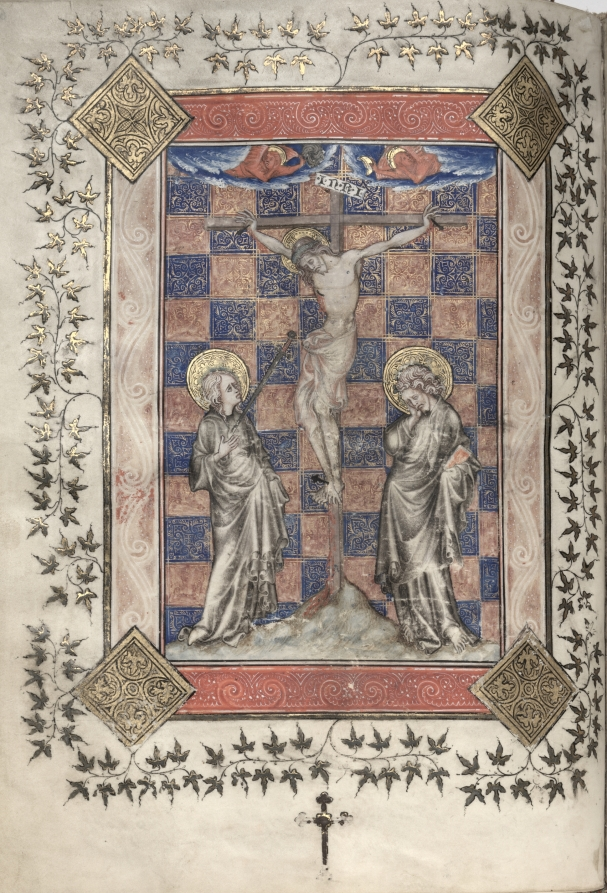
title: The Gotha Missal: Fol. 63v, Crucifixion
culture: France, Paris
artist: Master of the Boqueteaux (French)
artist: and Workshop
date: c. 1375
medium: ink, tempera, and gold on vellum; blind-tooled leather binding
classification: Bound Volume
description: The style and quality of this manuscript's decoration is typical of deluxe Parisian books made for aristocratic or royal patrons. Most of the book's decoration appears to be the work of the Master of the Boqueteaux, an artist active at the court of King Charles V (died 1380). His style was apparently shared by a number of book illuminators working in and around Paris. It is very possible that the Gotha Missal belonged to Charles V, but is not provable because the manuscript has no royal portraits and lacks a colophon. Given the book's magnificent decoration, however, it would seem that it was produced for a Valois prince, if not for the king himself. The manuscript receives its name from the German dukes of Gotha, its later owners.